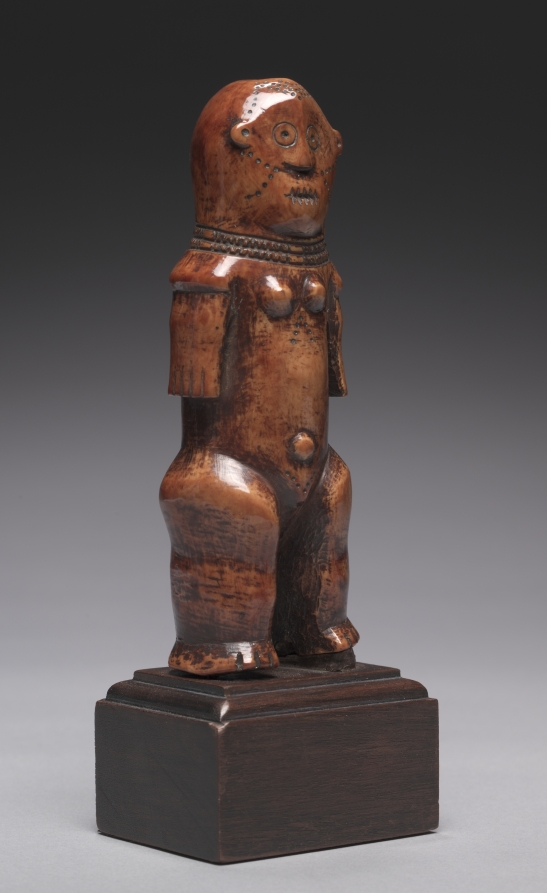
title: Figure (iginga)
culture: Africa, Central Africa, Democratic Republic of Congo, Lega-style maker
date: probably 1800s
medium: Elephant ivory, tukula, and oil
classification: Sculpture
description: The life of Lega men and women is structured around their advancement through the different grades of the Bwami association. Fulfilling political, social, religious, and other roles, the members’ ultimate purpose is the pursuit of wisdom and excellence. Ivory figurines were reserved for members of the two highest Bwami grades, in which the core of the Lega’s moral philosophy is revealed.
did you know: The dark surface (patina) of this sculpture comes from years of handling and the application of oil and a red powder called tukula; it was originally cream-colored!